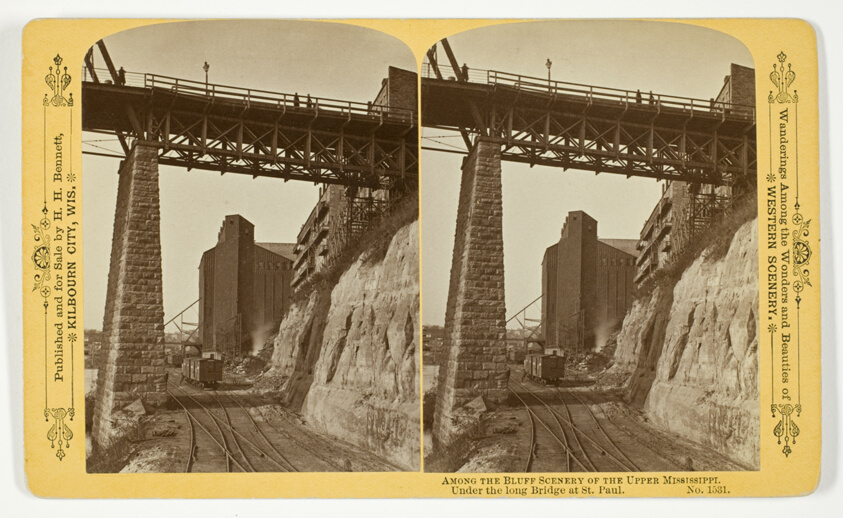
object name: Photograph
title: Under the long Bridge at St. Paul, No. 1531 from the series "Among the Bluff Scenery of the Upper Mississippi"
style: 19th century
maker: Henry Hamilton Bennett (American, born Canada, 1843-1908)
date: 1870/1908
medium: Albumen print, stereo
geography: Wisconsin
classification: photography; photograph; albumen silver print; stereograph (albumen)